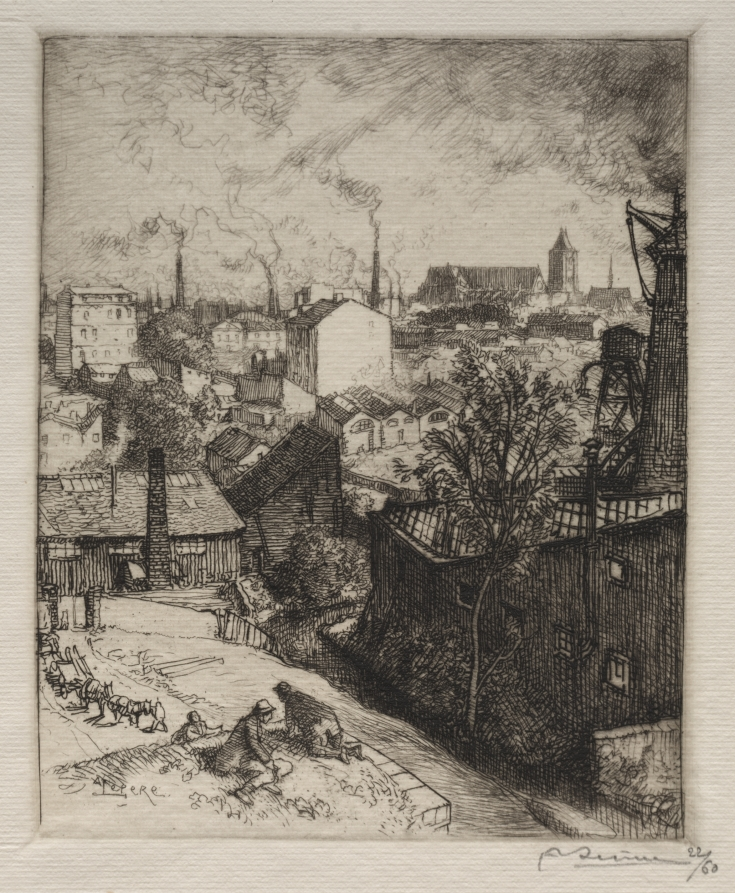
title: Souvenir de St. Denis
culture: France, 20th century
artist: Auguste Louis Lepère (French, 1849–1918)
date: 1913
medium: etching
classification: Print